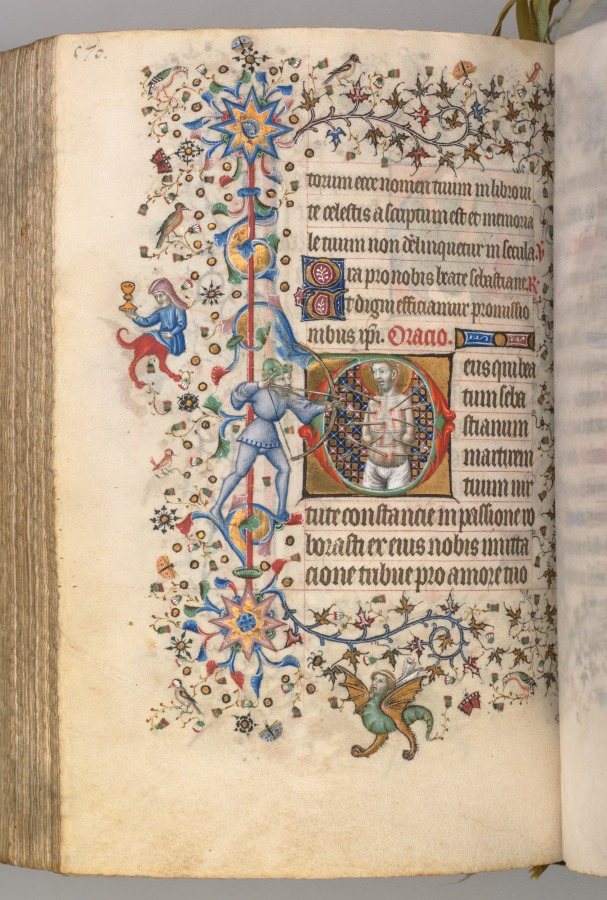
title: Hours of Charles the Noble, King of Navarre (1361-1425): fol. 279v, St. Sebastian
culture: France, Paris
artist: Master of the Brussels Initials and Associates (French)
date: c. 1405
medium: ink, tempera, and gold on vellum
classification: Bound Volume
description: This precious volume was obviously highly prized by its owner, the French-born King of Navarre, who had his coat of arms painted on no less than twenty folios. Rather than directly commissioning this manuscript from a specific workshop, it seems that Charles the Noble acquired his book of hours -- perhaps ready-made for the luxury market -- while on a trip to Paris in 1404-05. A collaborative effort, six painting styles are evidenced within the pages of this codex, those of two Italians, two Frenchmen, and two Netherlanders. The painter who was responsible for the planning and decoration of the book, and who produced seventeen of the large miniatures, was a Bolognese artist known as the Master of the Brussels Initials. His principal assistant, responsible for most of the borders, was a Florentine who signed his name "Zecho" da Firenze on folio 208 verso.